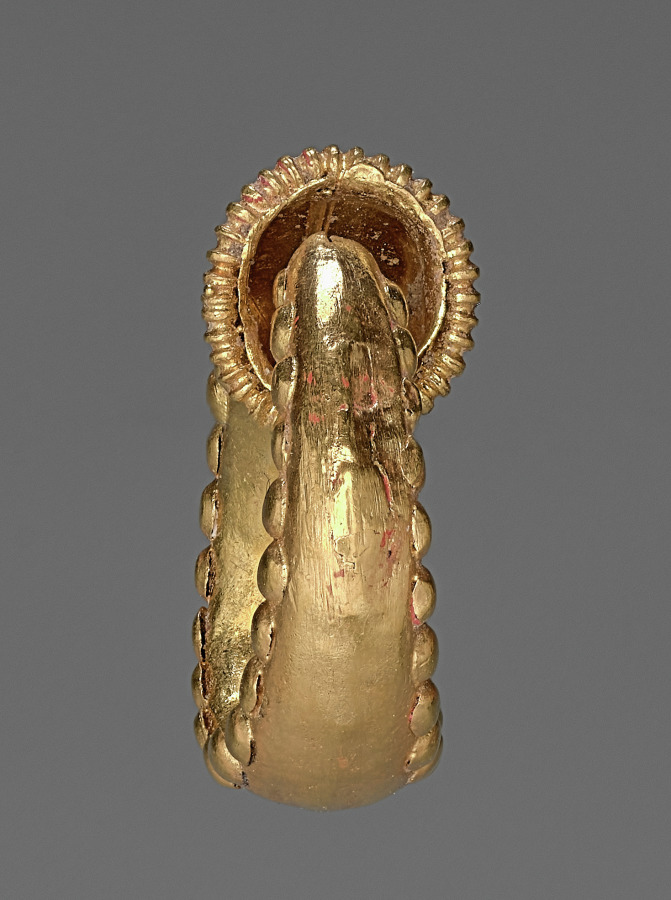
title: Earring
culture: Etruscan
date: 300s BCE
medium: gold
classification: Jewelry